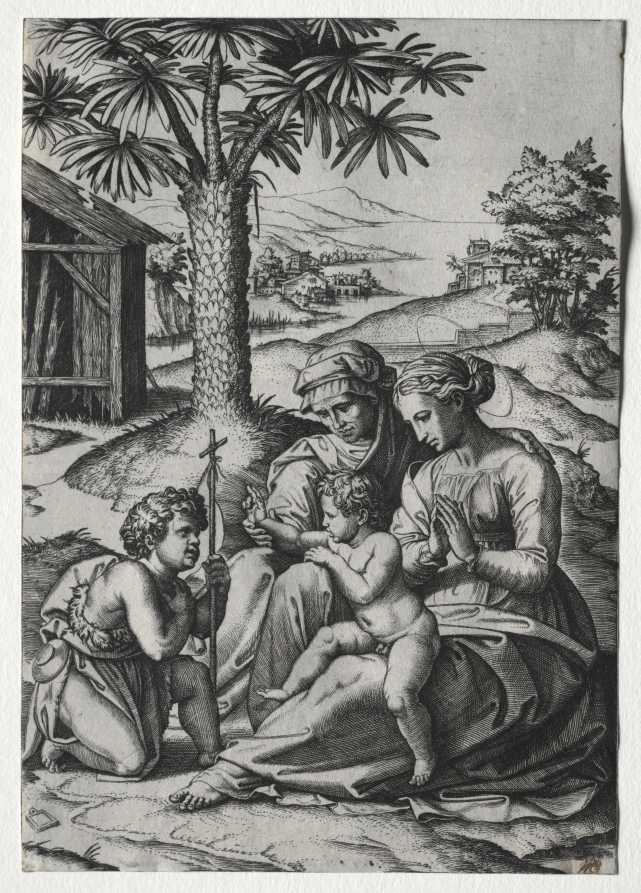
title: Madonna of the Palm Tree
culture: Italy, 16th century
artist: Marcantonio Raimondi (Italian, 1470/82–1527/34)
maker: after Raphael (Italian, 1483–1520)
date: c. 1520–25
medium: engraving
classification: Print